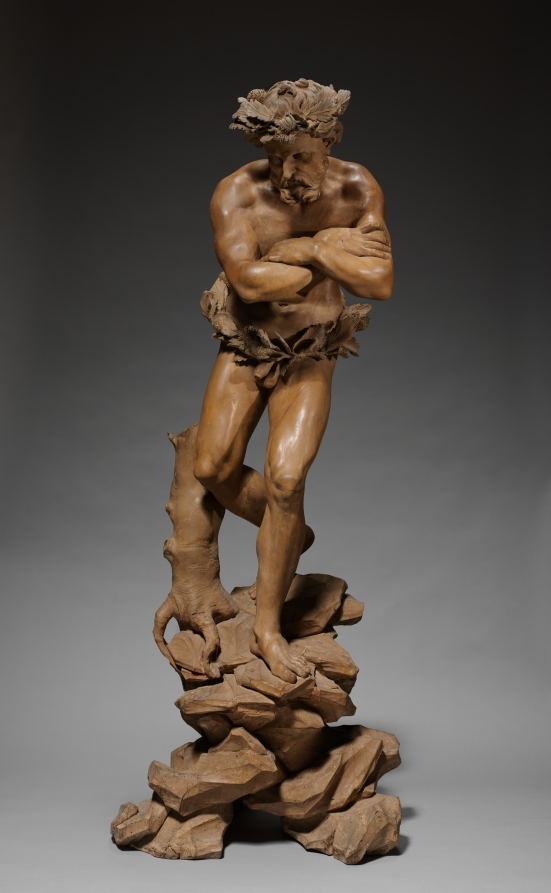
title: Winter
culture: Italy, 17th century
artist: circle of Filippo Parodi (Italian, 1630–1702)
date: c. 1700–1725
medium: wood with traces of gesso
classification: Sculpture